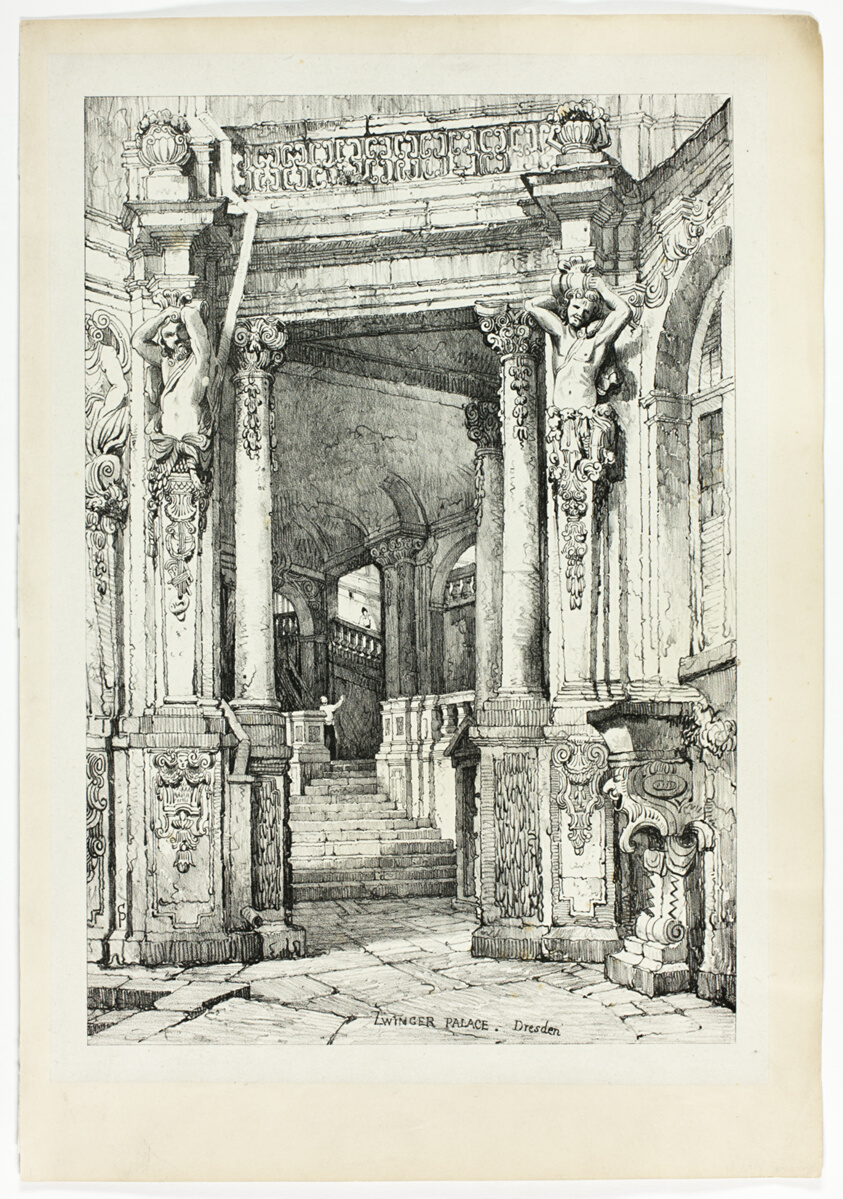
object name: Print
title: Zwinger Palace, Dresden, from Facsimiles of Sketches made in Flanders and Germany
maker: Samuel Prout (English, 1783-1852); printed by Charles Joseph Hullmandel (English, 1789-1850)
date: 1833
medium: Lithograph in black on grayish-ivory chine, laid down on ivory wove paper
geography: England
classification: lithograph; print; prints and drawing